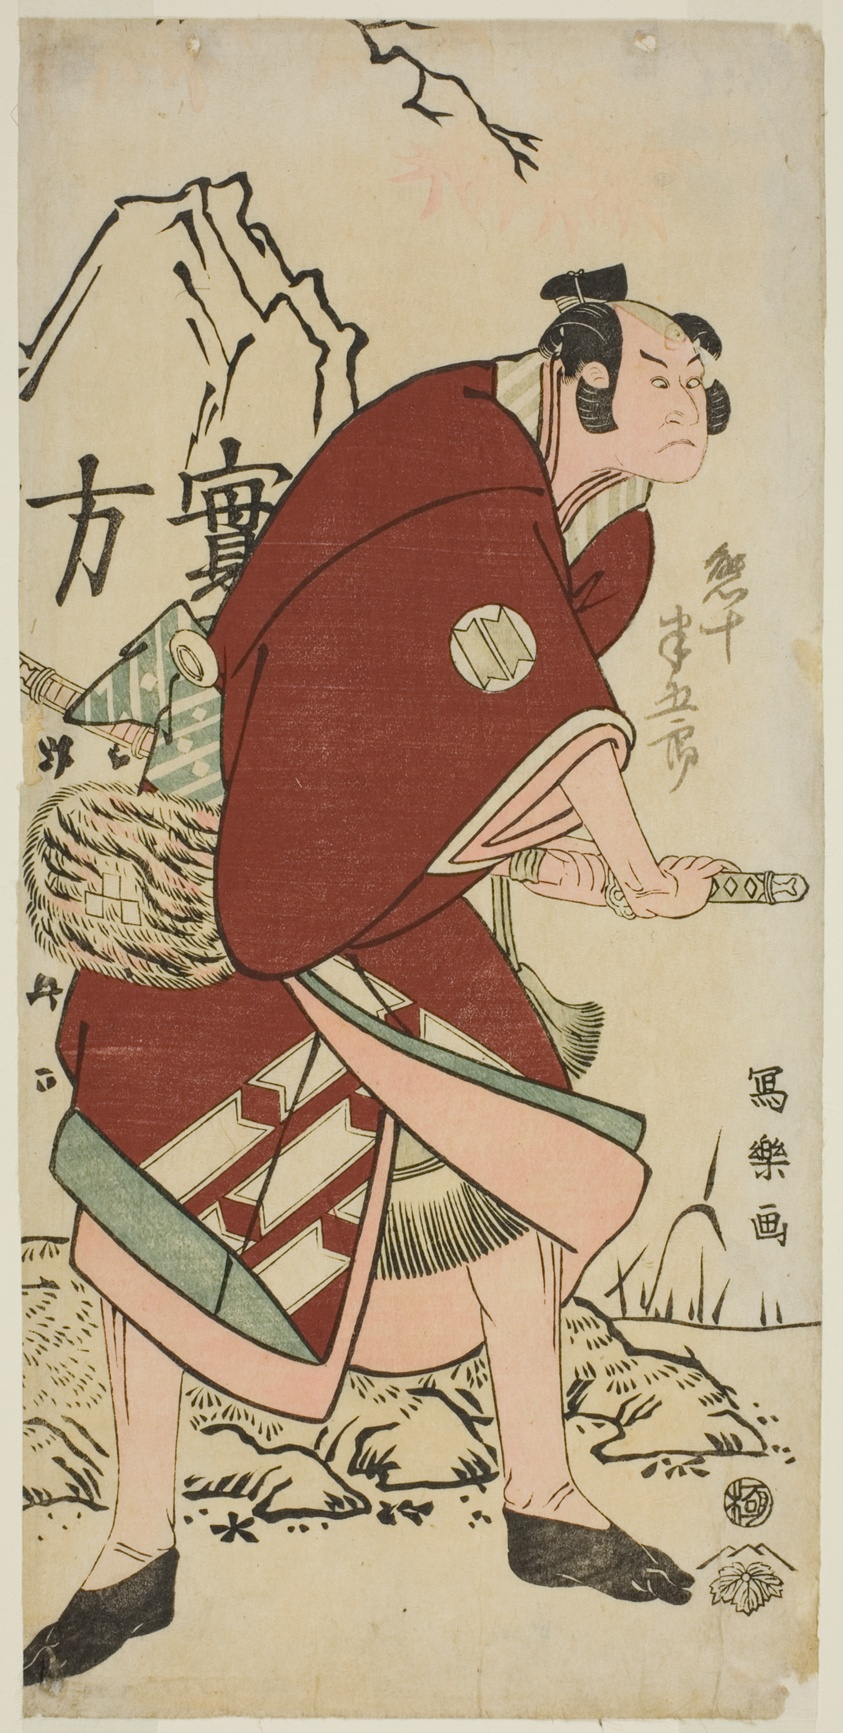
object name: Print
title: Sakata Hangoro III in the Role of Yahazu no Yadahei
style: Japanese (culture or style)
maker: Toshusai Sharaku 東洲斎 写楽; Japanese, active 1794-95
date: 1794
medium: Color woodblock print; hosoban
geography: Japan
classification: woodblock print; print; asian art